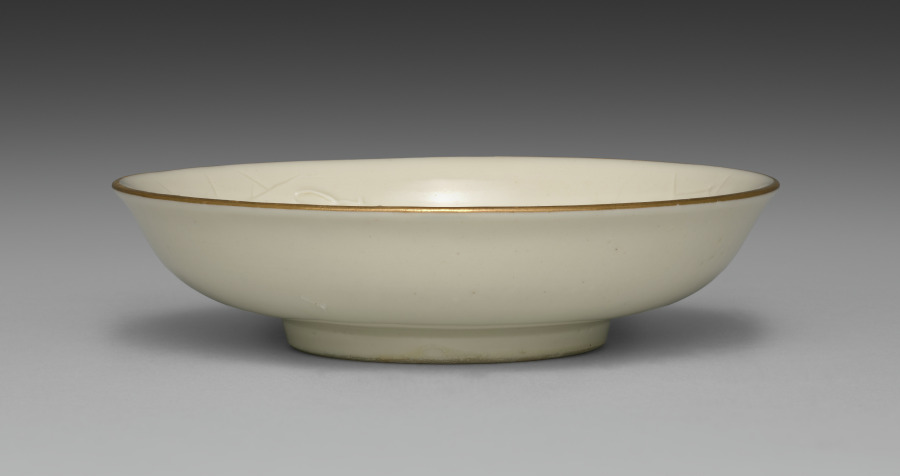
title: Small Dish from Dining Set with Plum Blossoms and Cracked-Ice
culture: Japan, Meiji period (1868–1912)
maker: Seifū Yohei II (Japanese, 1844–1878)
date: c. 1875–78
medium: Porcelain with molded designs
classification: Ceramic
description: Each item in this set has a delicate low-relief design of flowering plum branches over scattered, intersecting lines meant to resemble the cracked-ice surface of a frozen body of water and is signed on the base in gold pigment. While Yohei II produced many fine works in underglaze blue, like those produced by Kiyomizu Shichibei, he also made works in quite different styles later in his career, from the early 1870 s. In 1873, he was appointed purveyor to the Industrial Center of Kyoto Prefecture, a designation associated with Kyoto’s efforts to reach an international market through the port of Kobe; and from 1875 until his death, he was involved in national-level projects to present Japanese ceramics across the world. It was during this period that Yohei III was apprenticed to Yohei II, and it has been suggested that this set may in fact be an early example of Yohei III’s work, which he signed with his teacher’s name. Decorated with flowers resembling Japanese textile motifs, the set calls to mind the design of Yohei II’s pair of vases with plum blossoms in the Victoria and Albert Museum. Here, the elaborate trees created for a formal public exhibition setting have been translated into the approachable blossoms of the genteel domestic environment. While the designs are consistent across the pieces, each raised flower petal and pistil and each incised line in the ice was done by hand, so the cups, bowls, and dishes are similar yet unique. The bottoms of two boxes once identified the set’s owner, but the information has been deliberately obscured with black ink. However, inscriptions still visible appear to indicate two occasions, once at the end of July 1886 , and once again in June 1916 , when parts of the set were requested from Hokura in Niigata Prefecture. The location corresponds to a neighborhood in the present-day city of Jōetsu. The surname Tsuji 辻 also appears on a paper tag affixed to one of the box cloths. Future research may possibly reveal more about their provenance. A vase by Yohei III in a private collection combines the formal grandeur of the Yohei II vases in the Victoria and Albert Museum with the gentler design of this dining set, placing flowering plum trees against soft, scalloped-edge clouds resembling those in golden screens.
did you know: The dining wares have a creamy white coloration that the four boxes containing them identify as Korean in style.